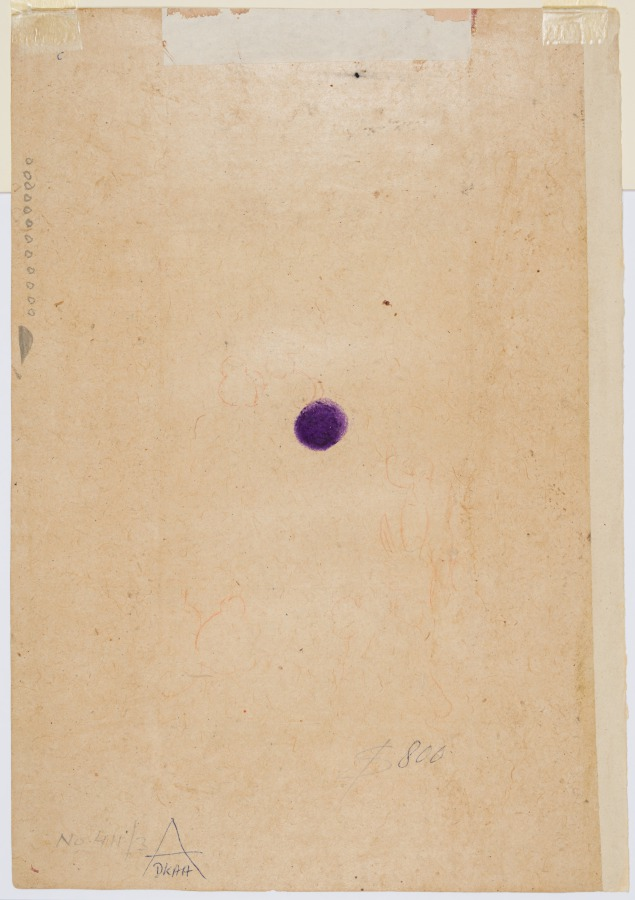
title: Krishna and Consort on a Palace Balcony with Musicians: Vukharo Ragaputra of Bhairav, from the “Boston Ragamala”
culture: Northwestern India, Rajasthan, Rajput Kingdom of Kota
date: 1770–75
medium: gum tempera, ink, silver, and gold on paper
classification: Painting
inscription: 12. bharu kau putra bukhārau ādha gaiṛī dīna caḍhā geve'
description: The mood of this scene is joyous, as the blue-skinned god Krishna sits with his beloved in a high covered balcony. Below, exuberant musicians blow horns and clap time. One man in front plays the cymbals next to the open-mouthed singer on a lute-like instrument. A guard sits relaxed and unworried, counting the beads of his rosary.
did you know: This musical mode is performed at early morning, suggested by the sunrise at the horizon.